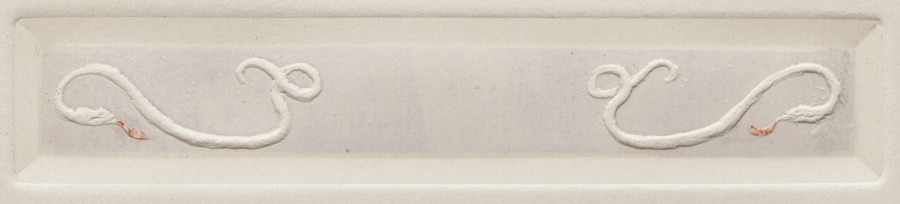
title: Decorative Motif/ Small Standing Figure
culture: France, early 20th Century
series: La Loïe Fuller, by Roger Marx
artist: Pierre Roche (French, 1855–1922)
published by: Les Cents Bibliophiles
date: 1904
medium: gypsograph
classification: Bound Volume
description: Although best known as a sculptor, Roche was a versatile and prolific artist who worked in many mediums. Loïe Fuller, the pioneer of modern dance who took Paris by storm in 1892, was one of his favorite subjects. He portrayed her in clay, bronze, marble, plaster, and in a series of gypsographs that illustrated an essay by the art critic Roger Marx. The book was described as "a precious monument to Loïe Fuller."